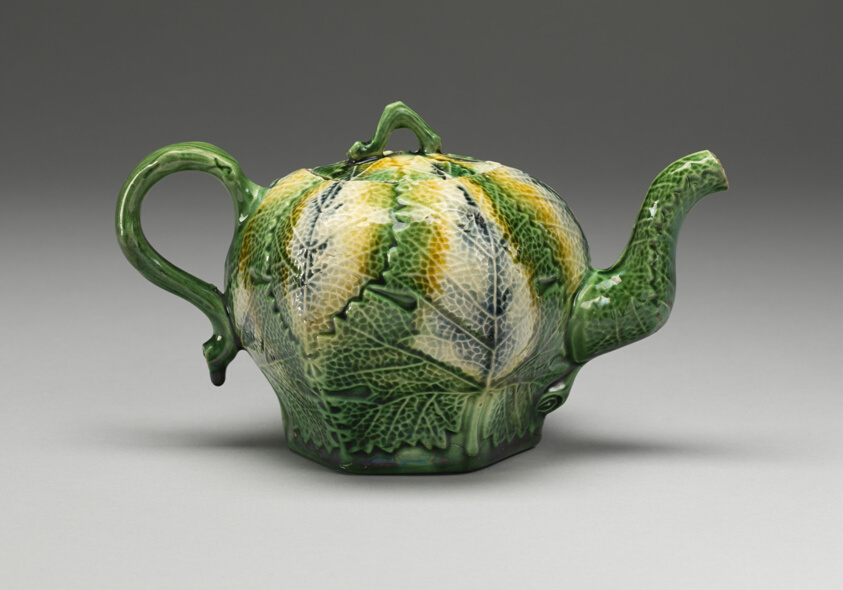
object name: Ceramics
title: Teapot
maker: England, Staffordshire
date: 1760/75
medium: Lead-glazed earthenware (creamware)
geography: Staffordshire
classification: teapot; earthenware; creamware; lead-glazed earthenware; european decorative arts; ceramics